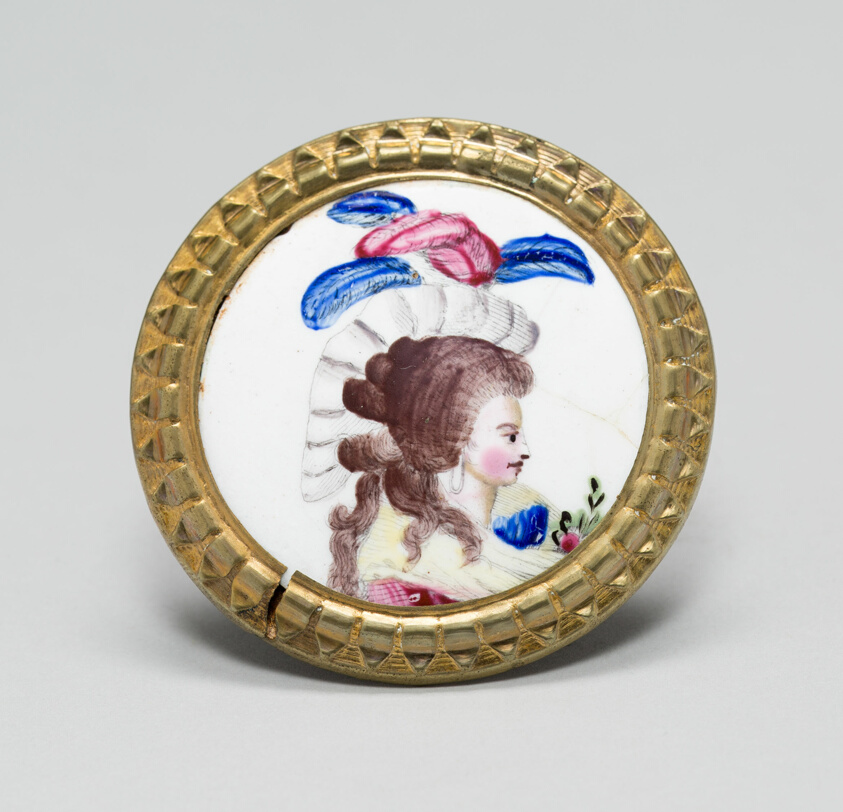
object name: Metalwork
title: Cloak Pin (Knob or Tieback)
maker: England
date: 1810/30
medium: Copper, transfer printed and polychrome enamel, gilt bronze, and iron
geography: England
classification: costume accessory worn above the waist; enamel; pin (jewelry); metalwork